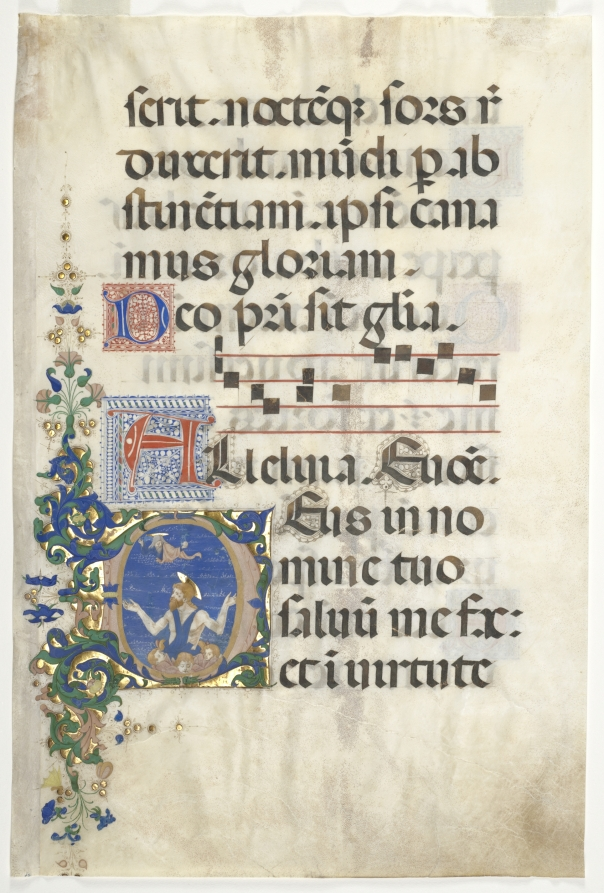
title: Leaf from a Gradual: Initial (D) with John the Baptist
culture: Italy, Florence, 15th century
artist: attributed to Francesco d'Antonio del Cherico (Italian, 1433–1484)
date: Late 1450s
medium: Ink, tempera, and gold on vellum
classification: Manuscript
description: This leaf comes from a gradual, a choral book containing the mass chants. It features a large decorated letter D introducing the Mass: Deus, in nomine tuo salvum me fac (Save me, O God, by thy name, and judge me in thy strength) from Psalm 53. Francesco d’Antonio del Cherico began his career as a goldsmith in Florence. He eventually changed his occupation to manuscript illuminator where he achieved much success. He was a pupil of Fra Angelico and became famous for being Lorenzo de’ Medici’s favorite illuminator. He gained a reputation for his well-executed illustrations in varying types of books ranging from small books of hours to large choir books. His illustrations often featured intricate floral arrangements, as seen here.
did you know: It was common practice in the Renaissance for illuminators to buy their pigments from apothecaries.